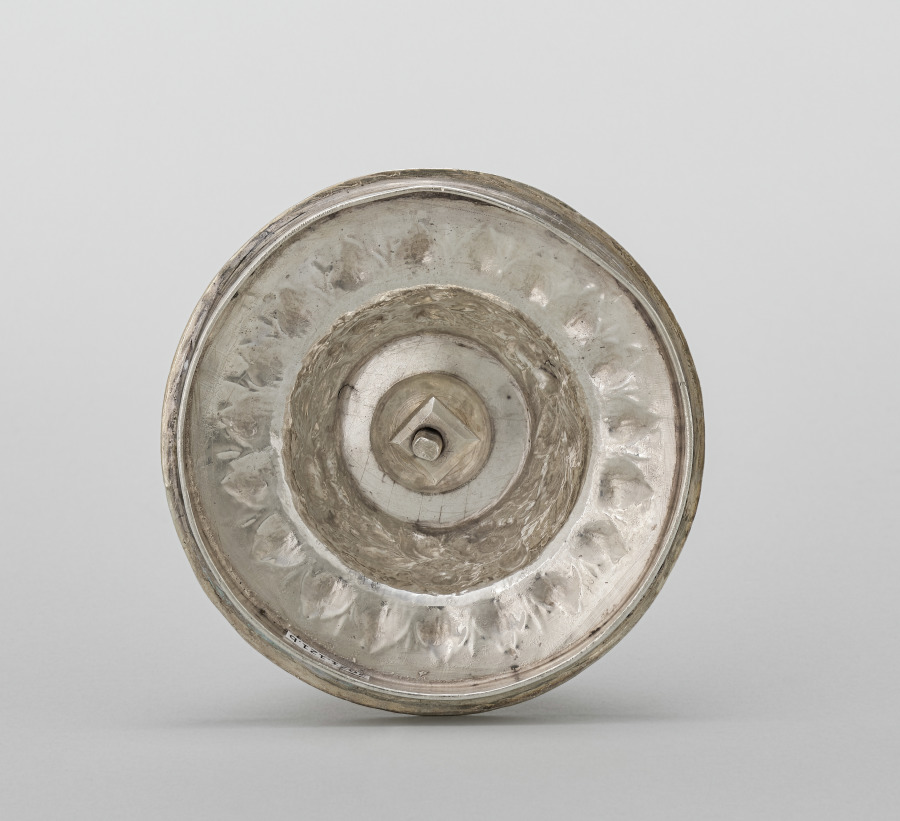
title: Cover for a Coffee Urn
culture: America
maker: Samuel Kirk (American, 1793–1872)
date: c. 1843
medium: Silver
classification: Silver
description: Samuel Kirk was a leading American silversmith in the early 19th century whose Baltimore studio had became a major American silver company that thrived throughout the middle of the 20th century. This cover is part of a large, impressive coffee urn. This highly decorated example was considered the ultimate in Samuel Kirk silver and was largely made by hand.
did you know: The decoration on this coffee urn was achieved through a technique known as "repoussé" in which the design was hammered into relief from behind.